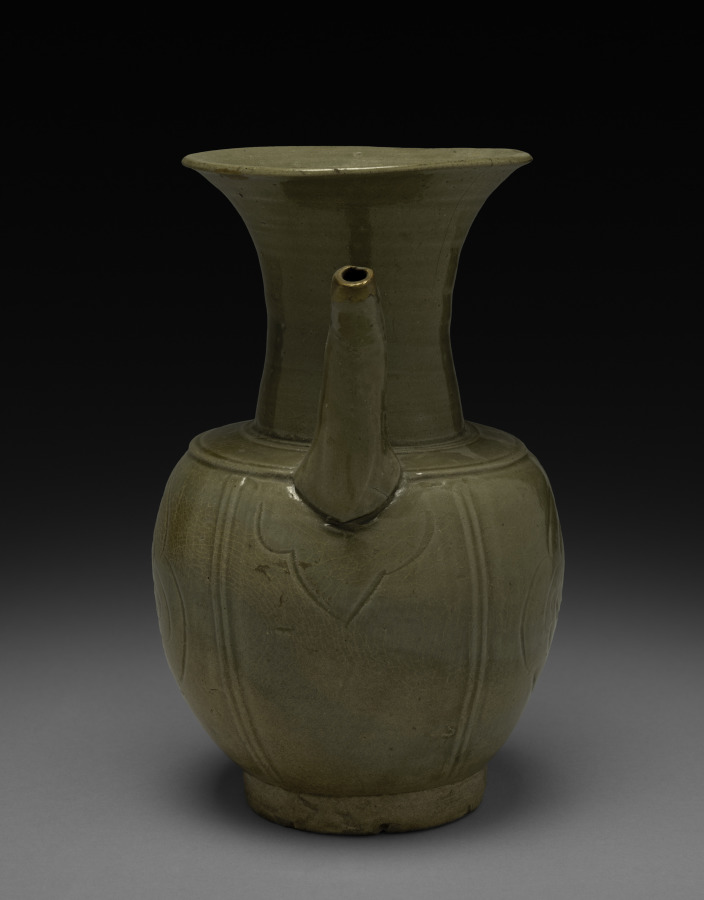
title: Wine Jug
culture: China, Zhejiang province, Shang-lin-hu type, Five dynasties (907–960) to Song dynasty (960–1279)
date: 900s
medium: glazed gray stoneware, Yue ware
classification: Ceramic